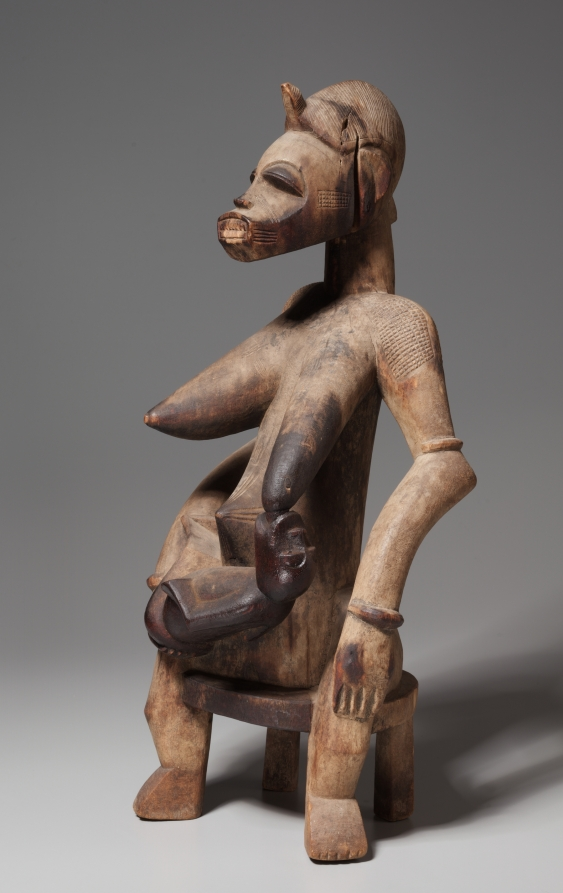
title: Nursing Woman with Child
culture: Africa, West Africa, Côte d'Ivoire, reportedly Korhogo area, Senufo-style carver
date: 1800s-1900s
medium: Wood and organic material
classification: Sculpture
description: Beyond its specific depiction of a mother nursing her child, this sculpture symbolizes a larger concept of ancestral motherhood that is central to Senufo society, in which cultural inheritance is matrilineal. The darkened areas of wood come from oils applied to its surface as both libations and surface protectants. In some Senufo beliefs, one of the most important founding ancestors is the Great Mother or Ancient Woman (Katyeleeo or Maleeo). In groups that believe in the Great Mother, she suckles male initiates with the "milk of knowledge." Through this process, youths gain the information they need to become adults (that is, fully human). The simplified appearance of the "child" in this sculpture reflects his unformed, pre-initiated state.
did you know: The mother’s face, adorned with incisions and markings, resembles that of women who have reached puberty.